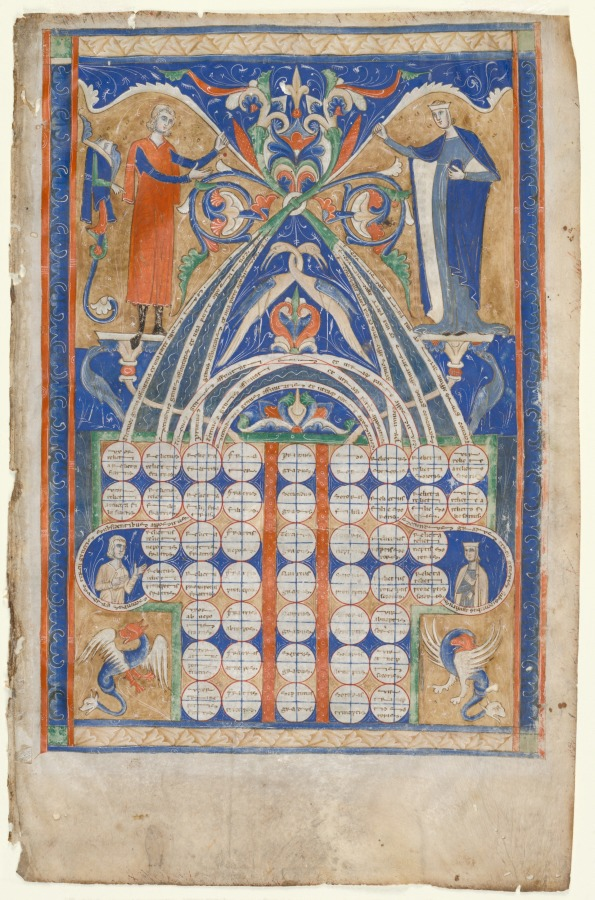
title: Leaves from Gratian's Decretum: Table of Affinity and Table of Consanguinity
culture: Italy, probably Naples, 13th century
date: c. 1270–1300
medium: tempera and gold on parchment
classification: Manuscript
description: These leaves were excised from a copy of the handbook of canon law known simply as the Decretum written by Gratian, an Italian Camaldolese monk, in Bologna around 1130-40. The Decretum was widely copied and consulted throughout the Middle Ages. These tables were used to determine relationships created by marriage. During the Middle Ages such relationships of "affinity" could be impediments to subsequent marriages if one partner were to die. In the direct line, for example, a man may not marry his mother-in-law or his daughter-in-law, while in the collateral line a man may not marry his uncle's wife or his wife's first cousin or niece. Like Tables of Consanguinity, Tables of Affinity were used by church officials to approve or deny marriages.